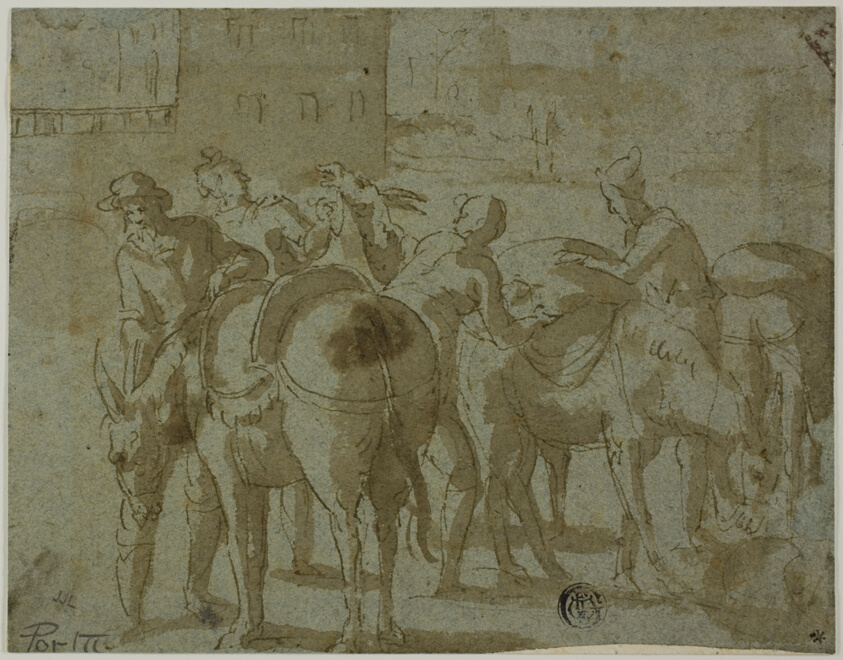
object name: Drawing and Watercolor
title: Muleteers and Mules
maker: Giovanni Guerra (Italian, 1544-1618)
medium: Pen and brown ink with brush and brown wash, on blue-gray laid paper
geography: Italy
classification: ink or chalk wash; drawings (visual works); prints and drawing